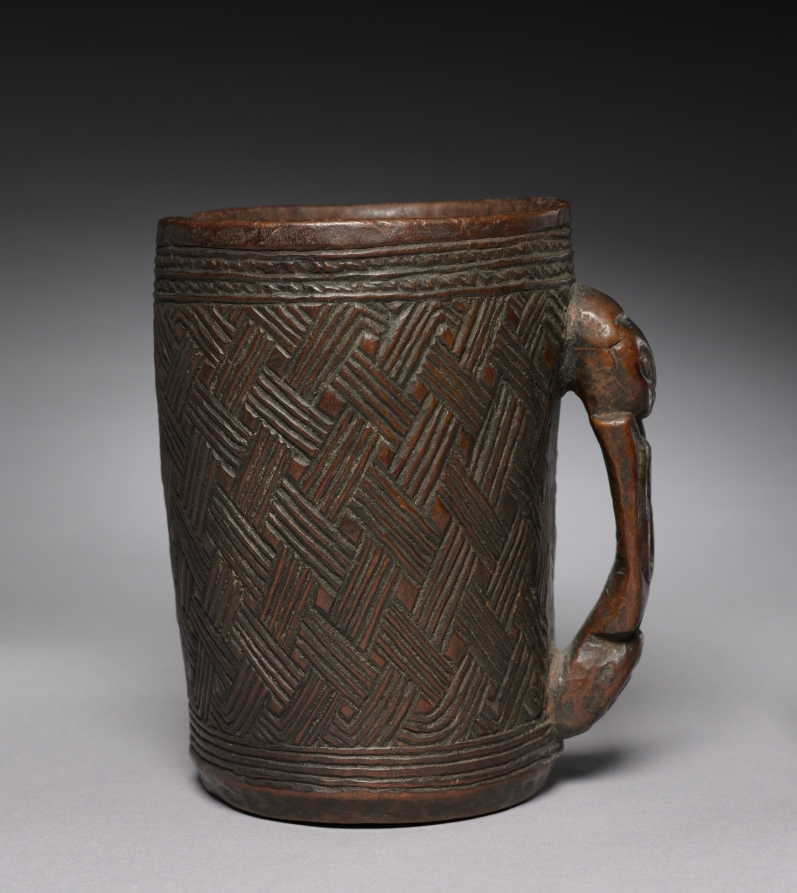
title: Cup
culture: Africa, Central Africa, Democratic Republic of the Congo, Kuba-style maker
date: early 1900s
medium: Wood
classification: Vessels